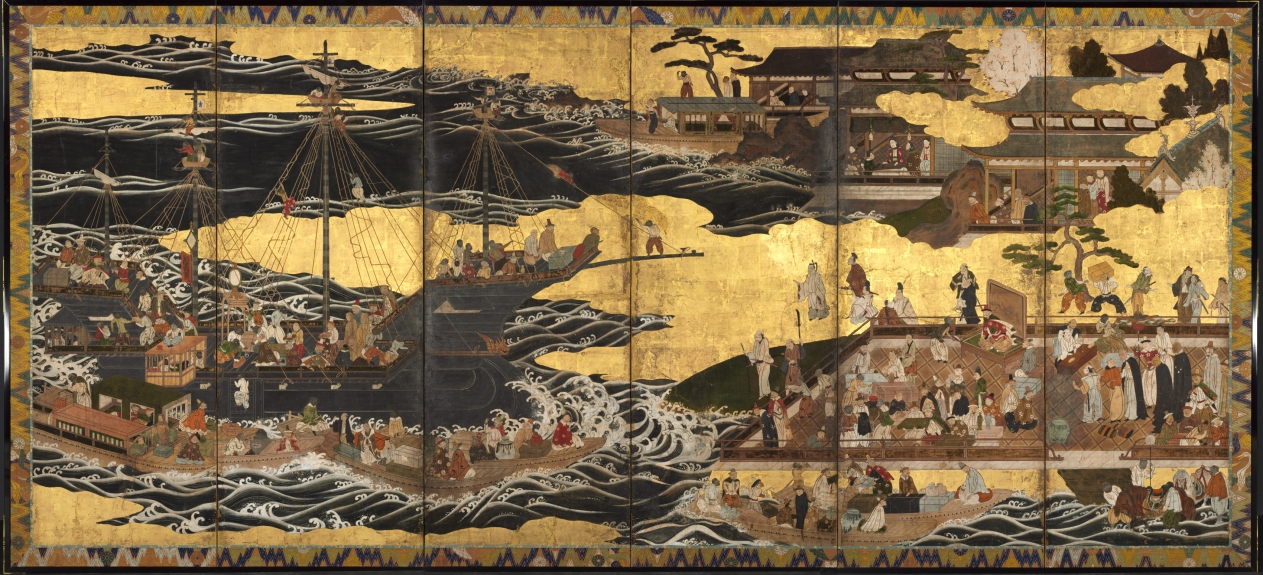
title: Arrival of the "Southern Barbarians"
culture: Japan, Momoyama period (1573–1615)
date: c. 1600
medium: One of a pair of six-panel folding screens; ink, color, and gold on paper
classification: Painting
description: This screen and its corresponding screen show Portuguese merchants arriving in Japan, having crossed the oceans in their large ship with a multinational crew. The Portuguese were known in Japan as the “Southern Barbarians” because they arrived from the south and their customs and manners were unfamiliar to the Japanese, who had not encountered anyone from Europe until their first appearance in 1543. In 1639, the Portuguese were forced out of Japan, mainly owing to internal difficulties caused by their Catholic missionaries, but they were a major conduit for both objects and ideas from Europe for nearly 100 years.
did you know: Europeans were called "Southern Barbarians" because their ships arrived in Japan from the south.